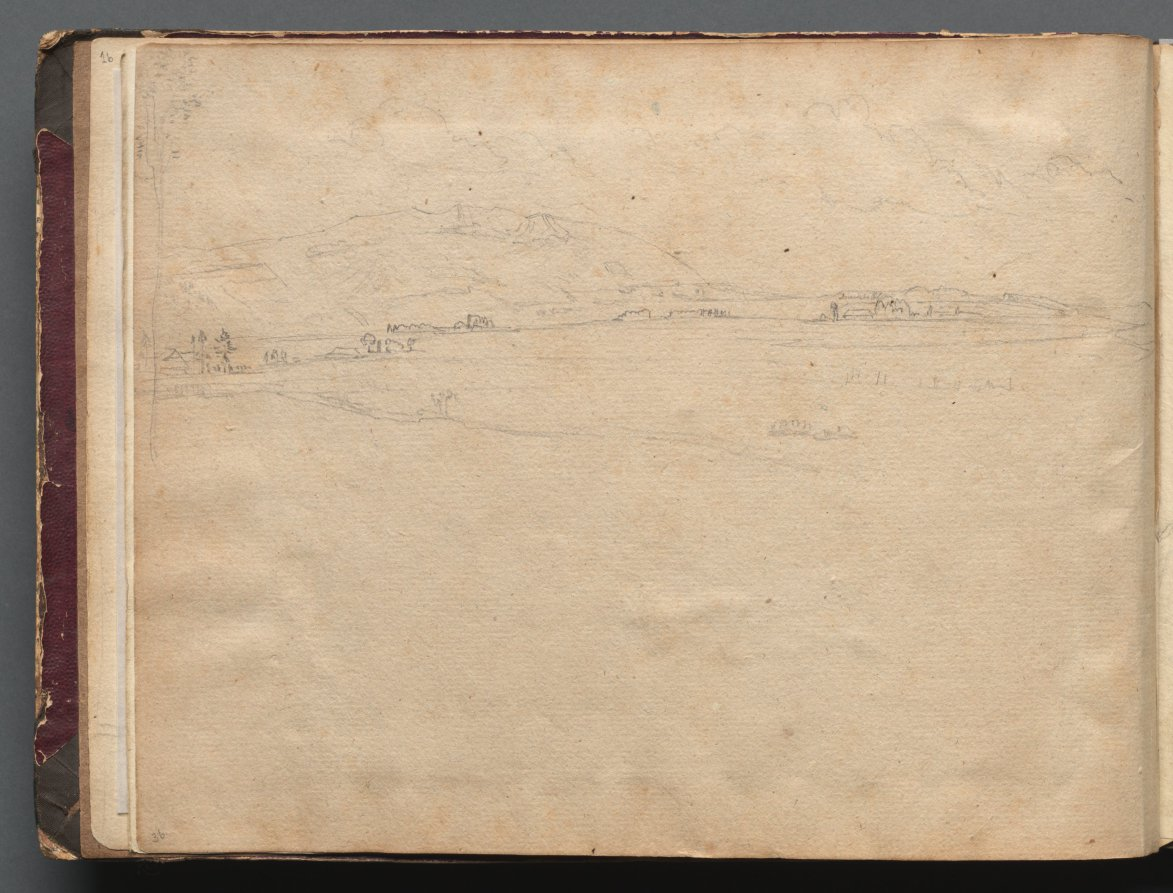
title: Album with Views of Rome and Surroundings, Landscape Studies, page 03b: Roman Panoramic Landscape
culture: Germany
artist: Franz Johann Heinrich Nadorp (German, 1794–1876)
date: c. 1830s-70s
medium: graphite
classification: Bound Volume